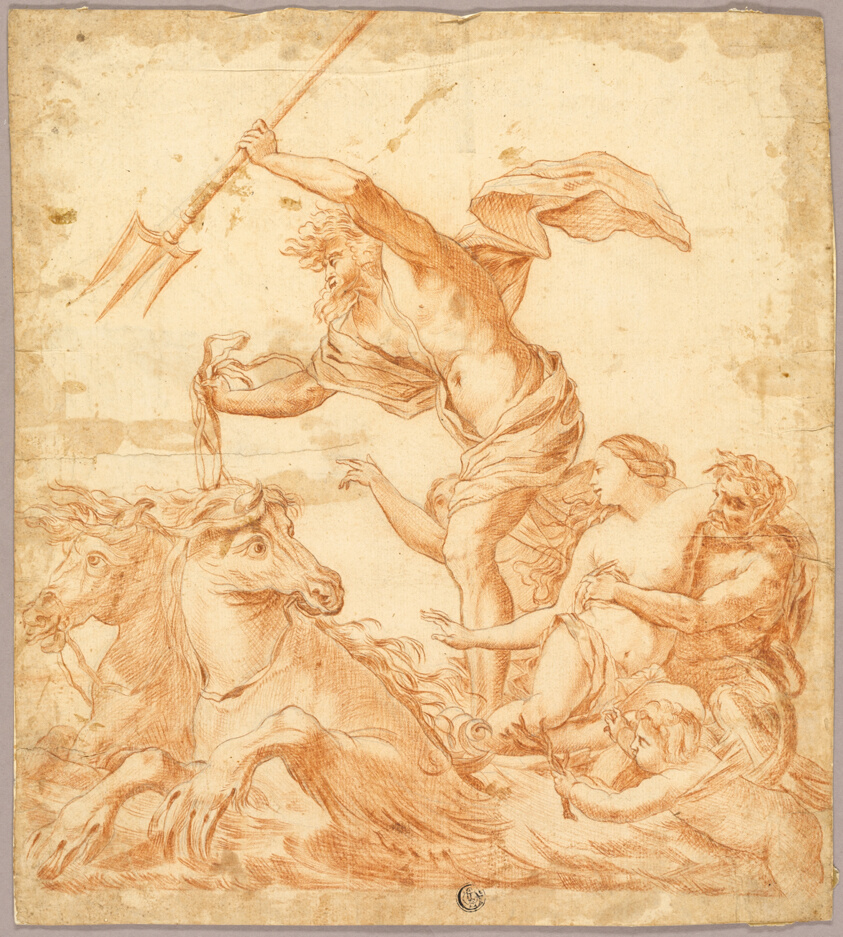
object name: Drawing and Watercolor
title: Triumph of Neptune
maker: Possibly after Simon Vouet; French, 1590-1649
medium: Red chalk, over graphite, on ivory laid paper, laid down on ivory laid paper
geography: France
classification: chalk; drawings (visual works); prints and drawing